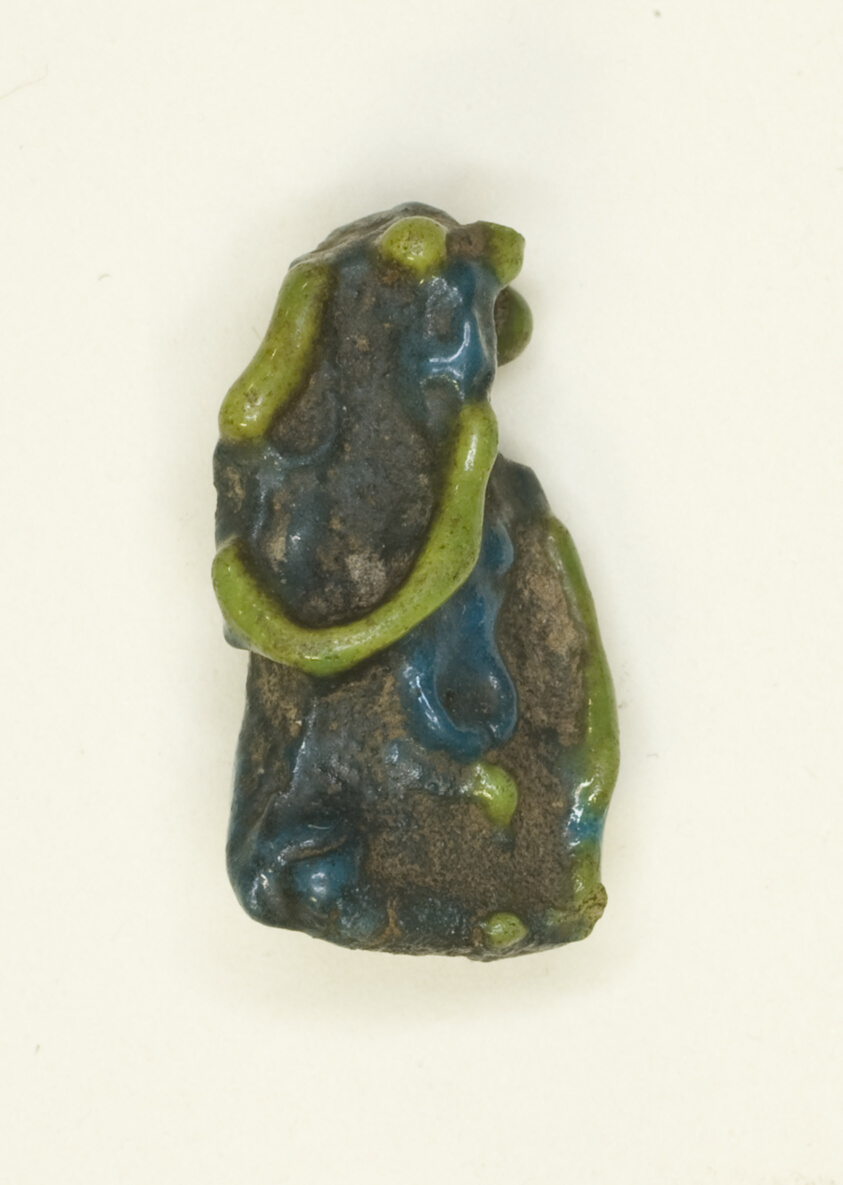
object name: Costume and Accessories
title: Glass Refuse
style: roman period (egyptian), greco-roman (egyptian)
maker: Egyptian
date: Third Intermediate Period–Late Period, Dynasties 21–26 (about 1069–525 BCE)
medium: Glass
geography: Egypt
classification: faïence; jewelry; earthenware; ceramics; amulet; ancient art; costume